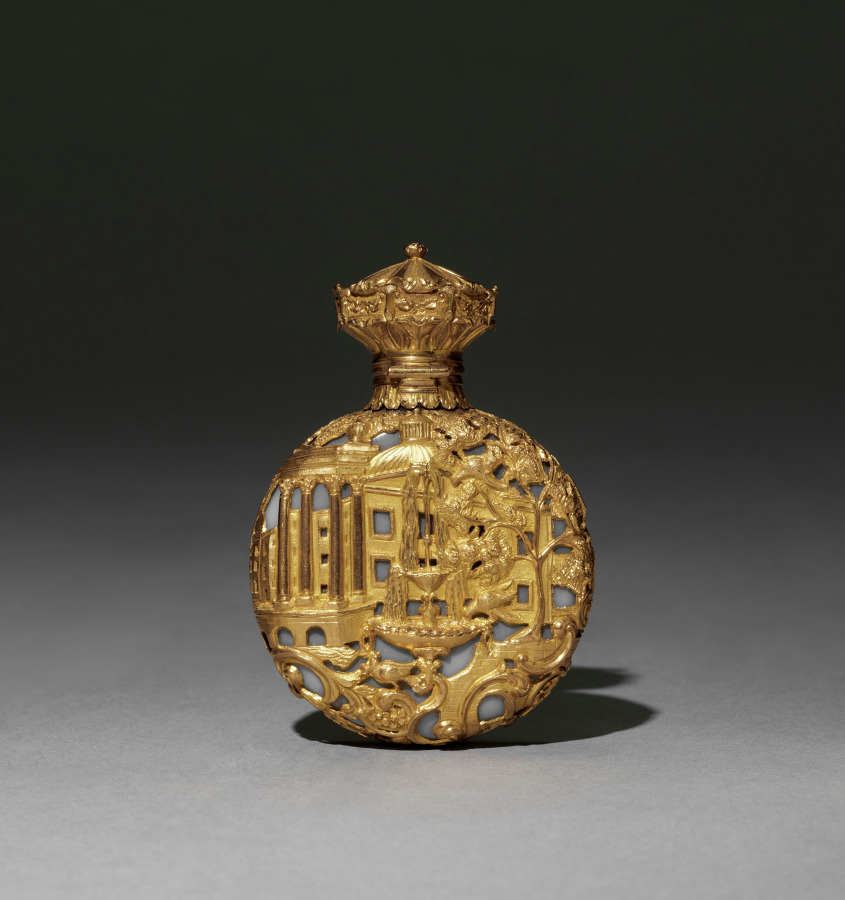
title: Scent Bottle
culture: Germany (?)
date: 1800s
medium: blue-gray opaline glass mounted in gold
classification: Miscellaneous